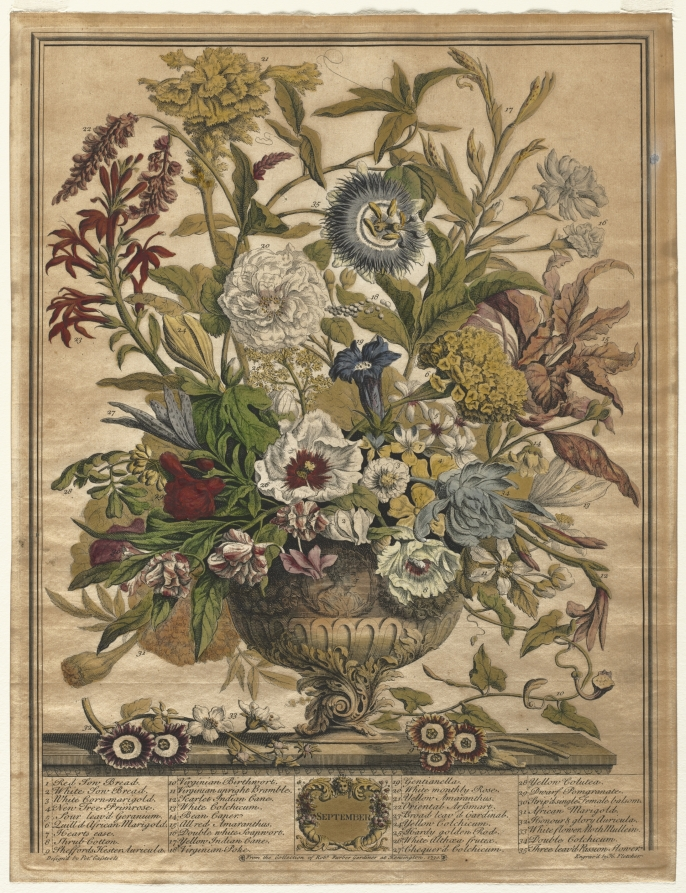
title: Twelve Months of Flowers: September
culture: England, 18th century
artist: Henry Fletcher (British, active 1715–38)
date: 1730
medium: engraving, hand-colored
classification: Print